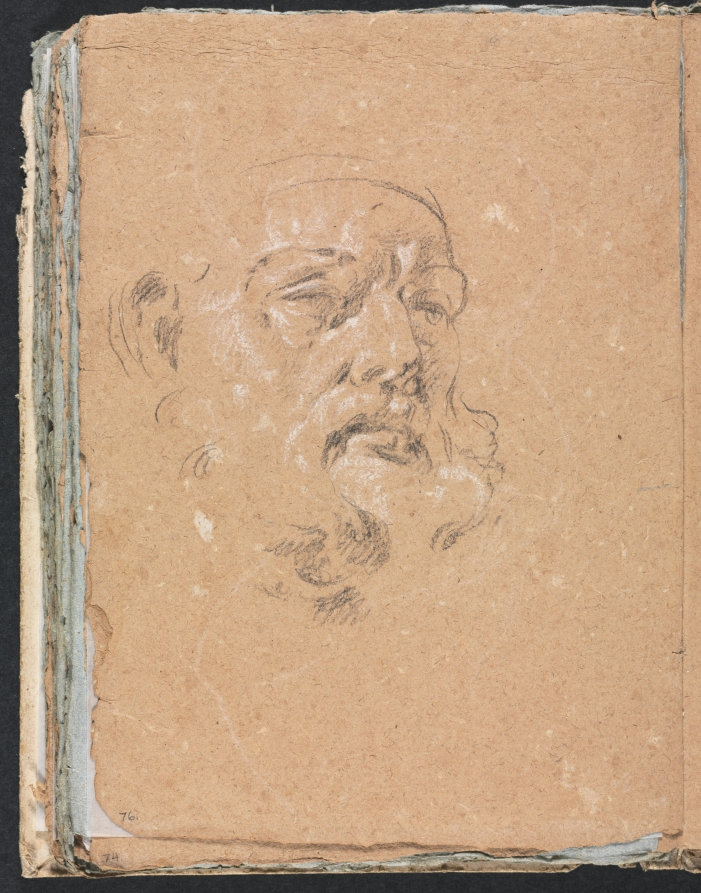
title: Verona Sketchbook: Male head (page 76)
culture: Italy, 18th century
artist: Francesco Lorenzi (Italian, 1723–1787)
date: 1760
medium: black chalk with white heightening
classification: Bound Volume